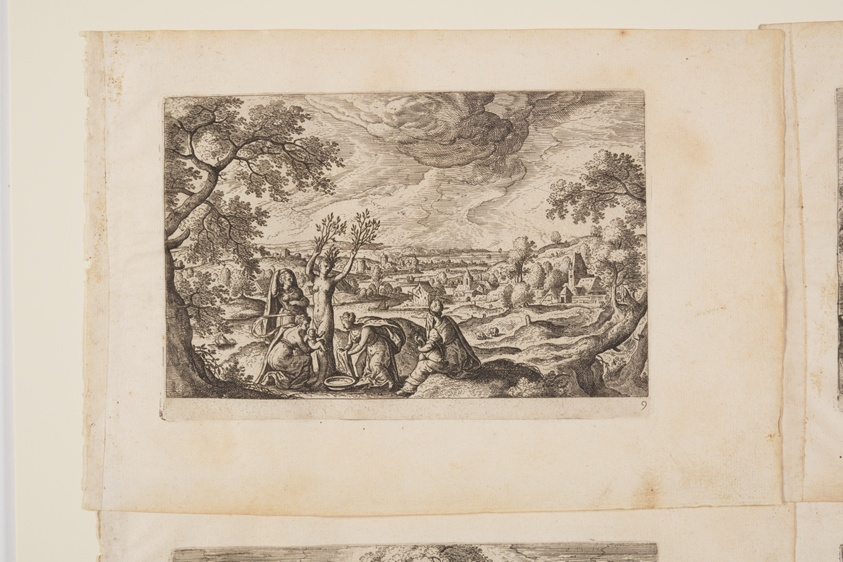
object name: Print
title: Plate 9, from Landscapes with Scenes from the Old and New Testament and Ovid’s Metamorphoses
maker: Hans Bol (Flemish, 1534–1593); published by Philip Galle (Flemish, 1537–1612)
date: 1574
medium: Etching on ivory laid paper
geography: Flanders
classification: print; paper; prints and drawing; etching